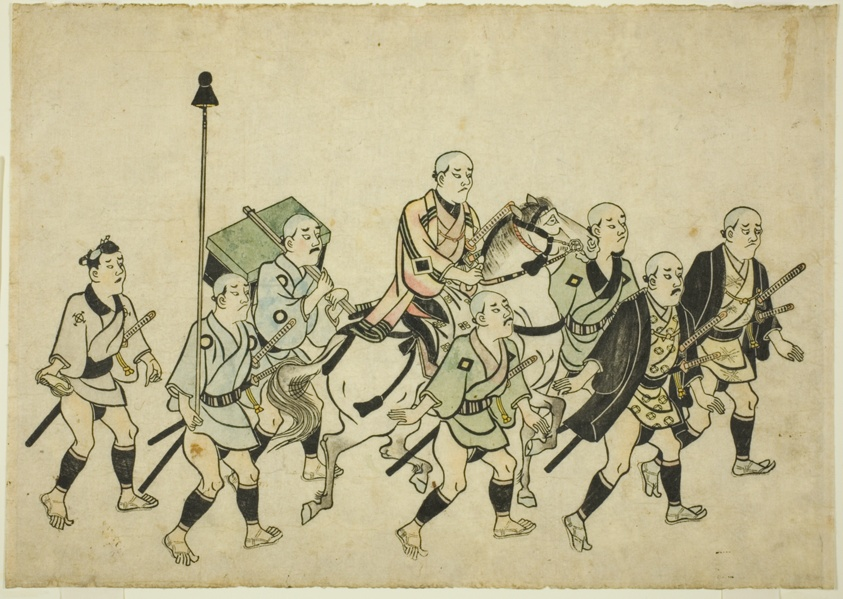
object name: Print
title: Procession of a Daimyo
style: Japanese (culture or style)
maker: Hishikawa Moronobu (Japanese, (?)-1694)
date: c. 1681/84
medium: Hand-colored woodblock print; oban yoko-e, sumizuri-e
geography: Japan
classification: woodblock print; print; asian art